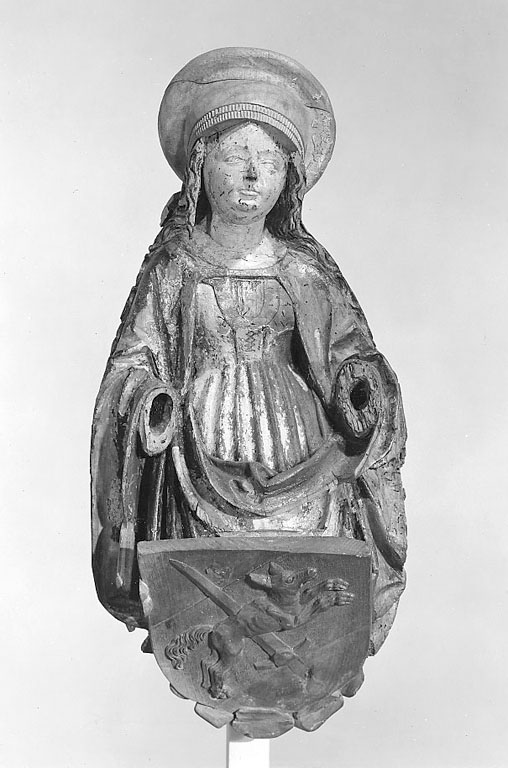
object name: Sculpture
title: Lüsterweibchen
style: sixteenth century, 16th Century, 17th Century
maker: South German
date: 1500-1600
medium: Wood with traces of paint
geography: Germany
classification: statuette; sculpture; sculpture/wood; wood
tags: woman, saints, shields, swords